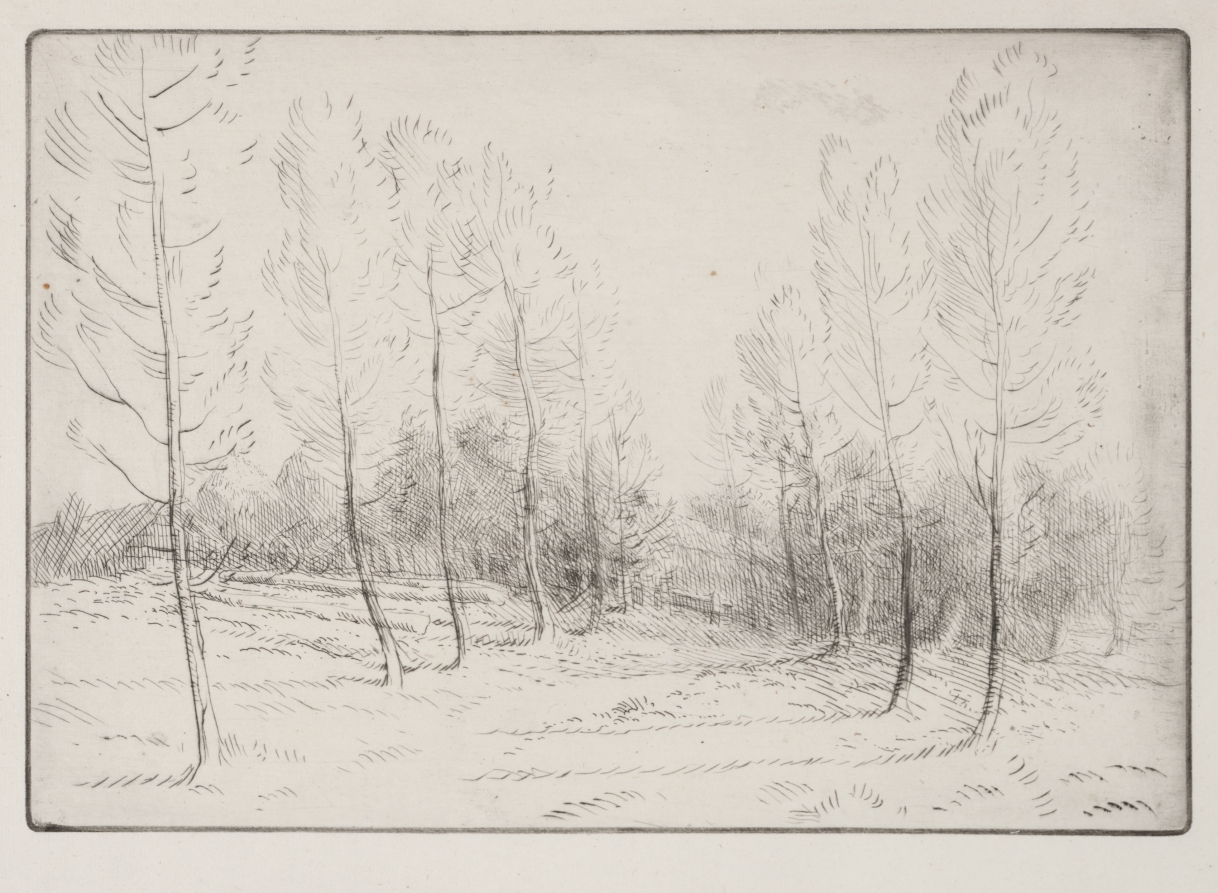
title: Avenue of Poplars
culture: France, 19th century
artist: Alphonse Legros (French, 1837–1911)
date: c. 1857–1911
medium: drypoint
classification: Print